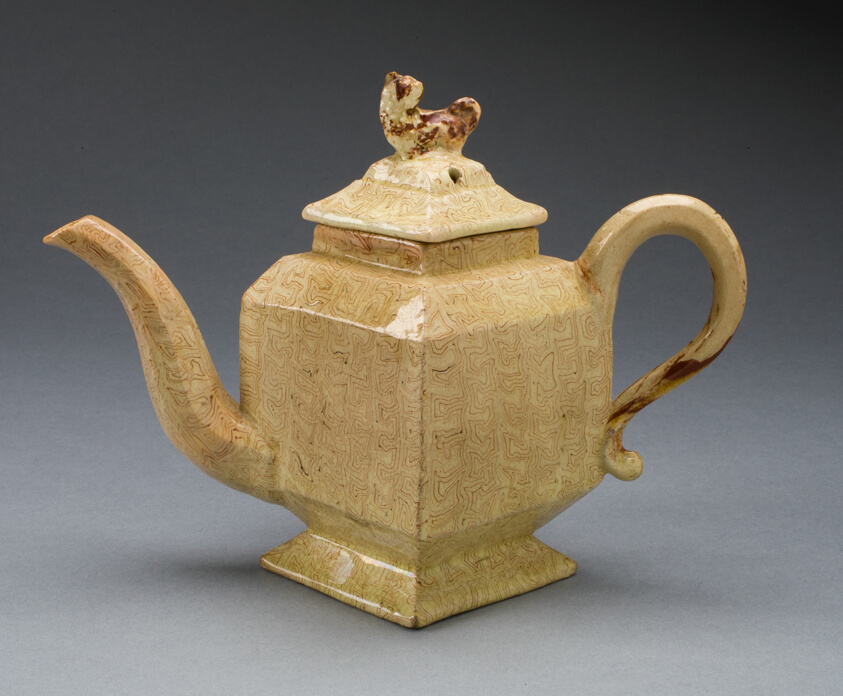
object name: Ceramics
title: Teapot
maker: Staffordshire, England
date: 1750/59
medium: Lead-glazed earthenware (agateware)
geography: Staffordshire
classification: teapot; earthenware; ceramics; agateware; lead-glazed earthenware; european decorative arts